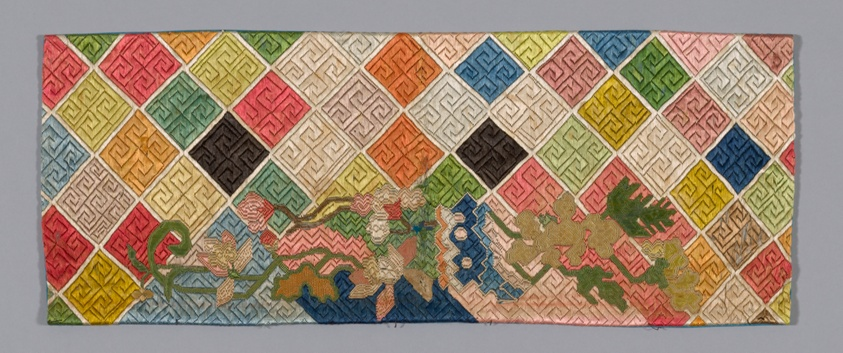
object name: Textile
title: Panel (Furnishing Fabric)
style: qing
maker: Han-Chinese (China)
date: Qing dynasty (1644–1911), 1875/1900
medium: Geometric and floral pattern embroidered on gauze.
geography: China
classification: weaving; needlework (visual works); textile; furnishing textile